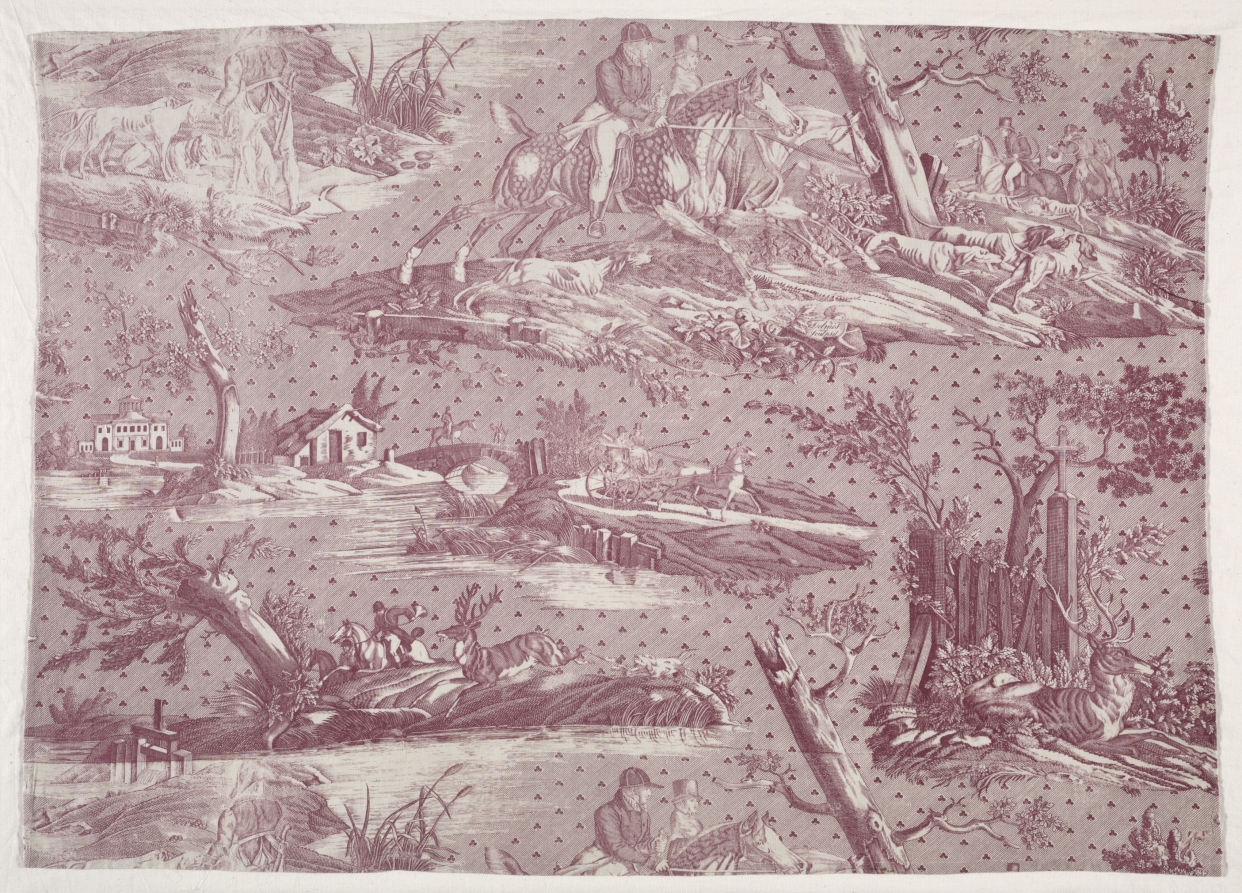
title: Fragment of Copperplate Printed Cotton with Hunting Scene Design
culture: France, Jouy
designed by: Horace Vernet (French, 1789–1863)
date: c. 1815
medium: copperplate printed cotton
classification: Textile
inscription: signed: "Delmes Sculpsit."